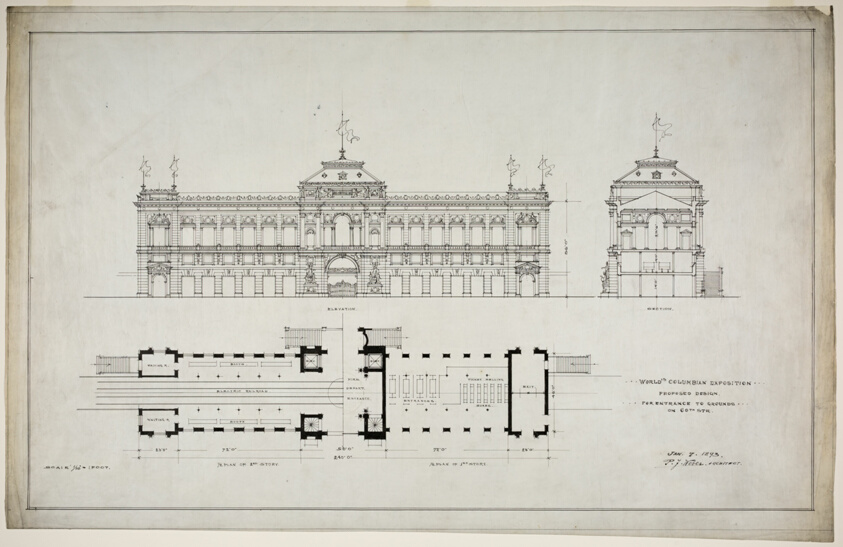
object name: Architectural Drawing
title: World's Colombian Exposition 60th Street Entrance, Chicago, Illinois, Plan and Elevation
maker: Peter J. Weber; American, born Germany, 1863-1923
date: 1893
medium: Ink on linen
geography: Chicago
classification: design drawing; architectural drawing; architecture